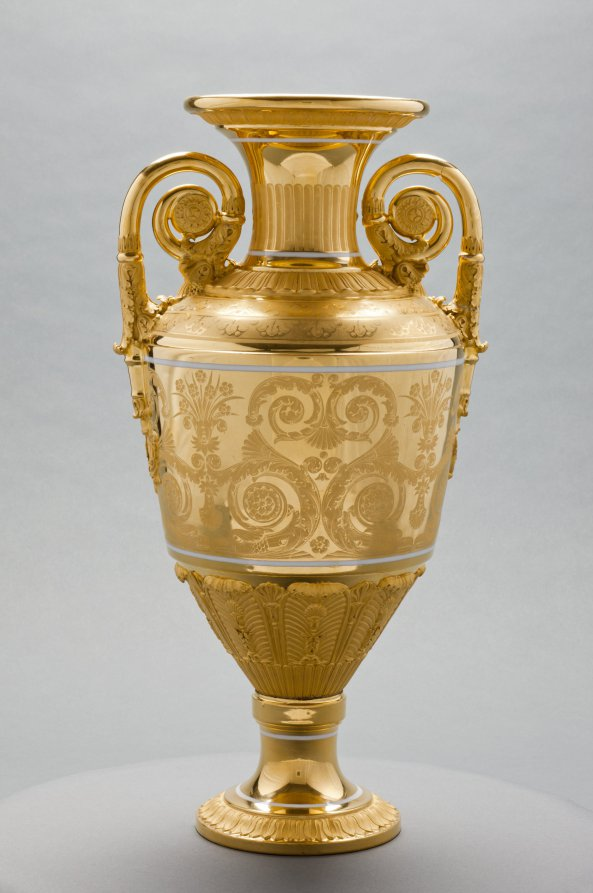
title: Vase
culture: Russia, St. Petersburg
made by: St. Petersburg Imperial Porcelain Factory (Russian)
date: c. 1820–1830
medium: gilt porcelain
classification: Ceramic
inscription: inscribed: "Moreau" in gold near lip.